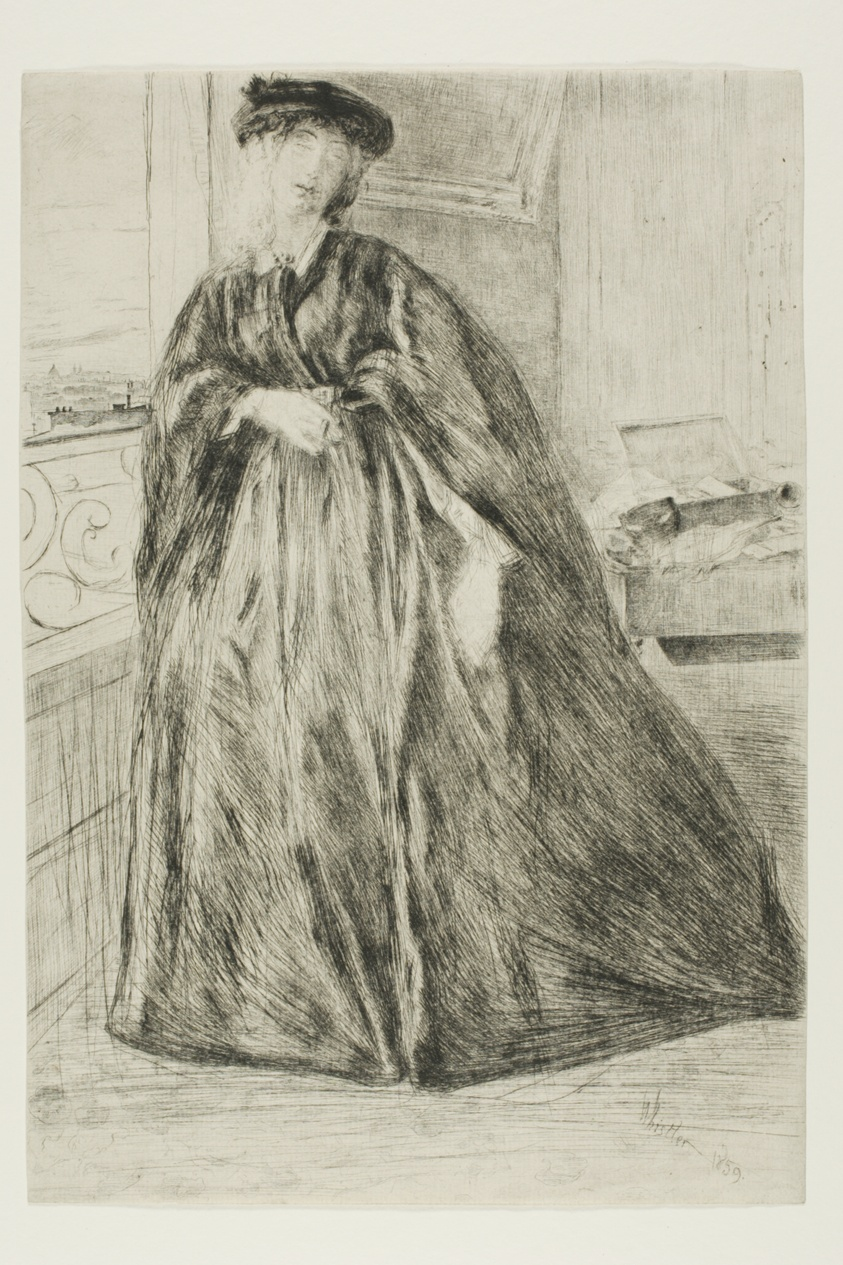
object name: Print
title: Finette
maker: James McNeill Whistler (American, 1834-1903)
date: 1859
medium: Etching and drypoint in black ink on buff laid paper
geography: United States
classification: etching; drypoint; print; prints and drawing; paper